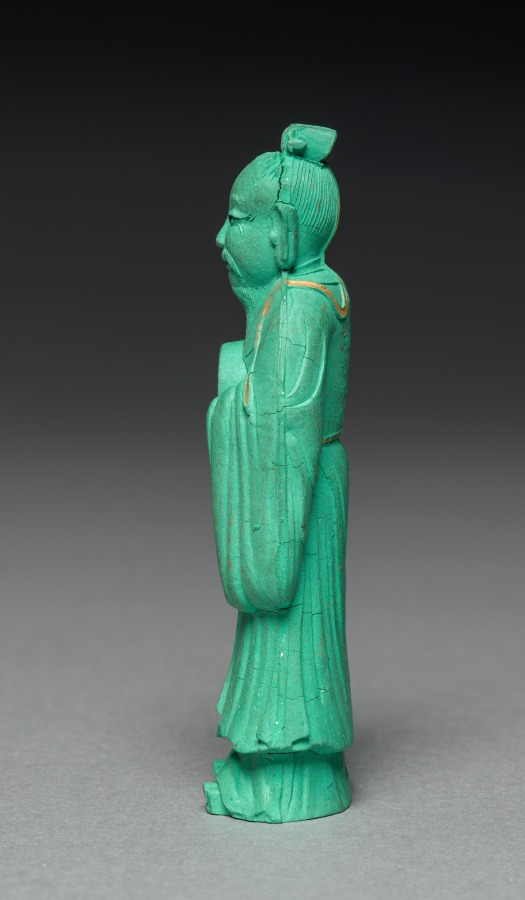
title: Ink Cake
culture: China, Qing dynasty (1644-1911)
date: late 19th Century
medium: ink cake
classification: Miscellaneous